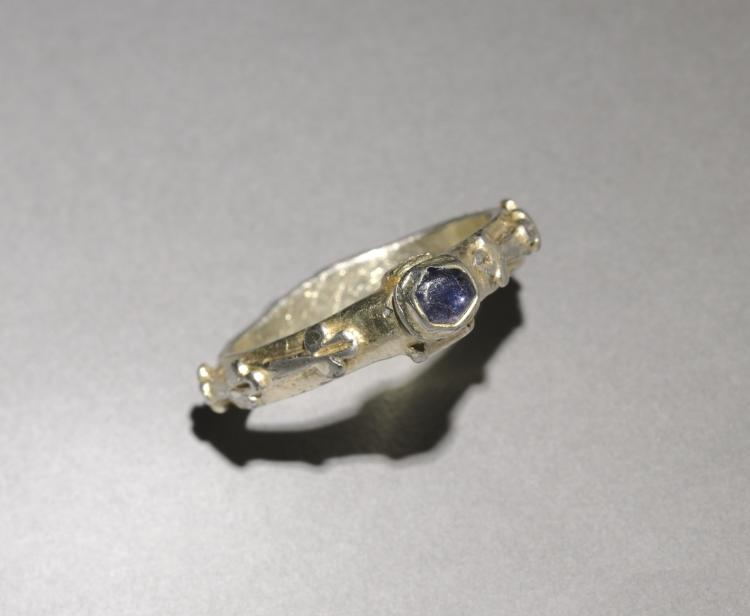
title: Ring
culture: England, 14th century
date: 1300s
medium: gilded silver, sapphire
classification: Jewelry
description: Tradition holds that this ring was found in a garden in Winchester, England. In the 14th century, rings were worn in large numbers-four or five on one hand. The symbols of the sun and moon and the clasped hands found on this ring suggest a sentimental relationship between a man and a woman.